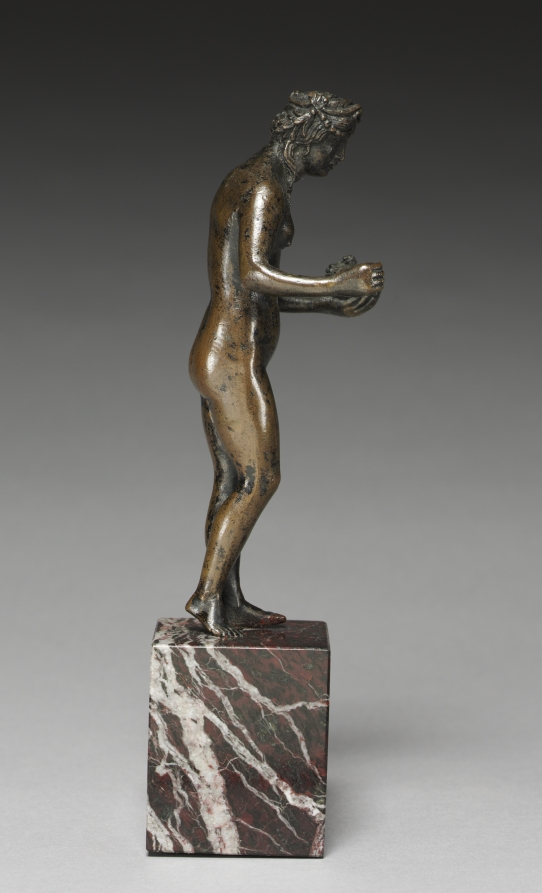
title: Pomona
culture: Italy, early 16th Century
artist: circle of Andrea Riccio (Italian, c. 1470–1532)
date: c. 1500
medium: bronze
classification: Sculpture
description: According to Roman mythology, the nymph Pomona cared for the gardens and forests, rejecting the pursuits of her suitors. The god Vertumnus fell in love with her. He disguised himself as an old woman, complimented her orchard and kissed Pomona passionately. As an old woman, Vertumnus explained that there was one person who loved both Pomona and her garden. Vertumnus then revealed himself to her, and from then on the two cared for Pomona's gardens together. Classicizing in style, Pomona stands nude with her weight on her left leg. She holds a bowl of fruit in her left hand while her right hand is clenched, suggesting it may have once held another object. Pomona wears a diadem, or headband, and hair decorated with a beaded garland falls in two locks over her shoulders. A hole has been drilled at the top of the figure's head for removal of the core and casting pins appear in the back of the right shoulder and on the front of the left leg. Other examples of this statuette exist in Oxford, Paris, Berlin and Washington. Only the Washington and Cleveland versions have been attributed to Riccio because of their superior quality of casting and the rich patinas.